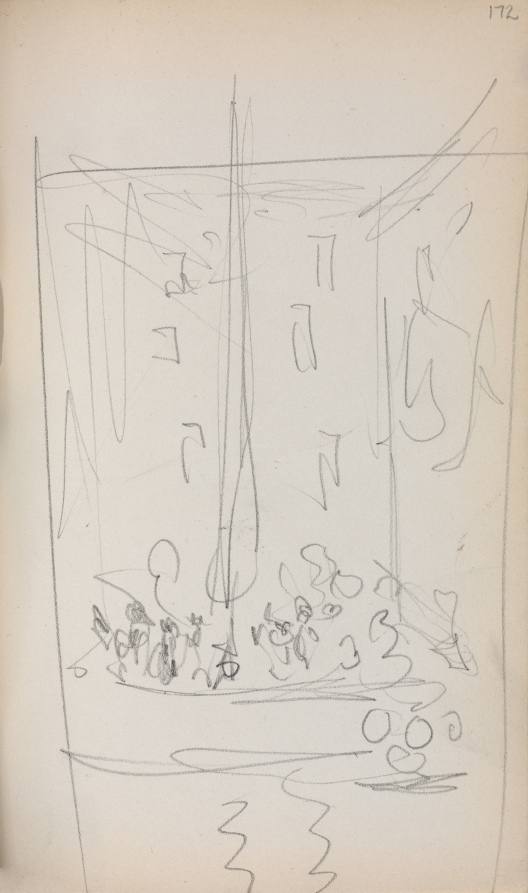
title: Italian Sketchbook: Boat with Figures (page 172)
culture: America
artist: Maurice Prendergast (American, born Newfoundland [now Canada], 1858–1924)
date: 1898–1899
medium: pencil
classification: Bound Volume